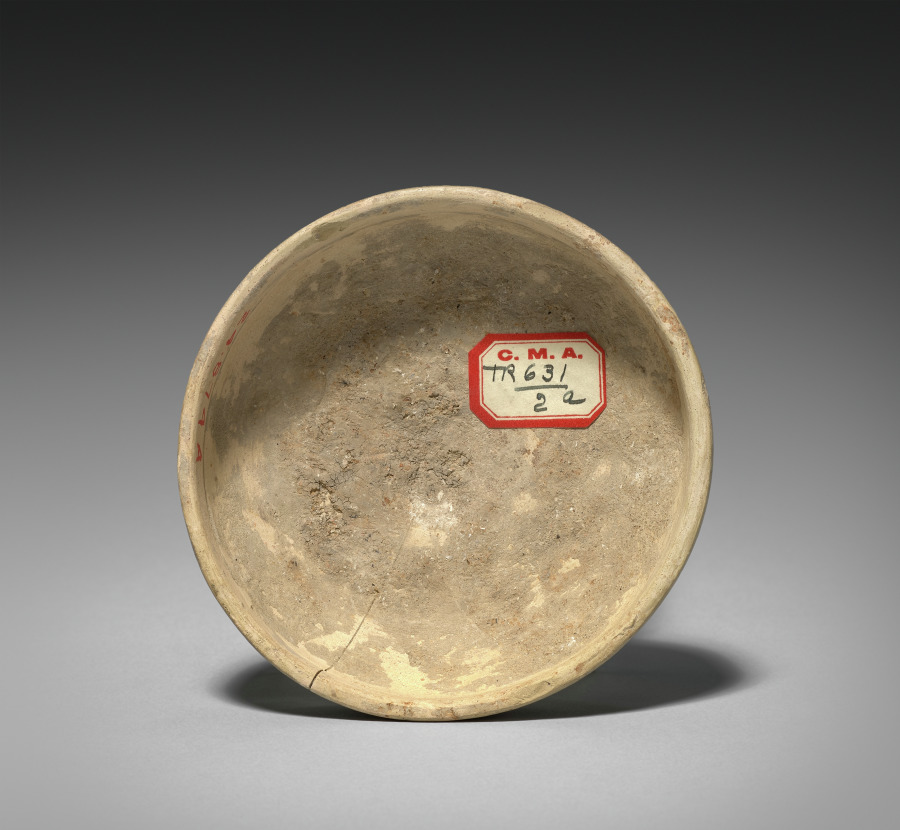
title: Corinthian Vase (lid)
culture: Greece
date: 600s BCE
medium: earthenware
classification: Ceramic